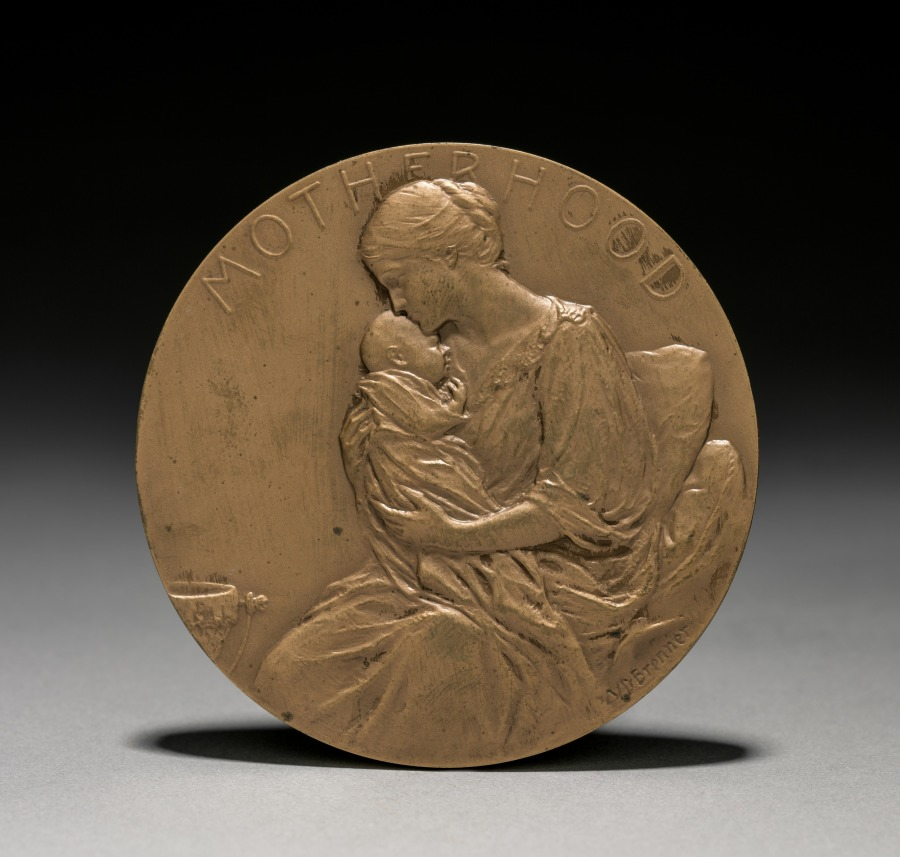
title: Medal: Motherhood (obverse)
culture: America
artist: Victor D. Brenner (American, 1871–1924)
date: 1911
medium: bronze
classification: Metalwork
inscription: above: "MOTHERHOOD"; lower right: "VD Brenner."